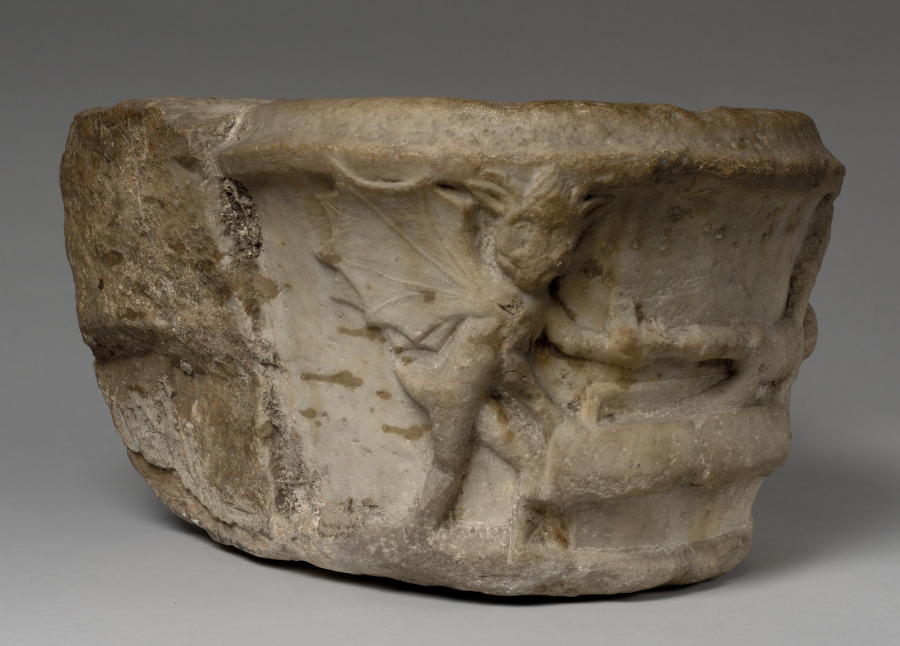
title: Holy Water Font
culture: Southern France, late 15th century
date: late 1400s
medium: marble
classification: Sculpture